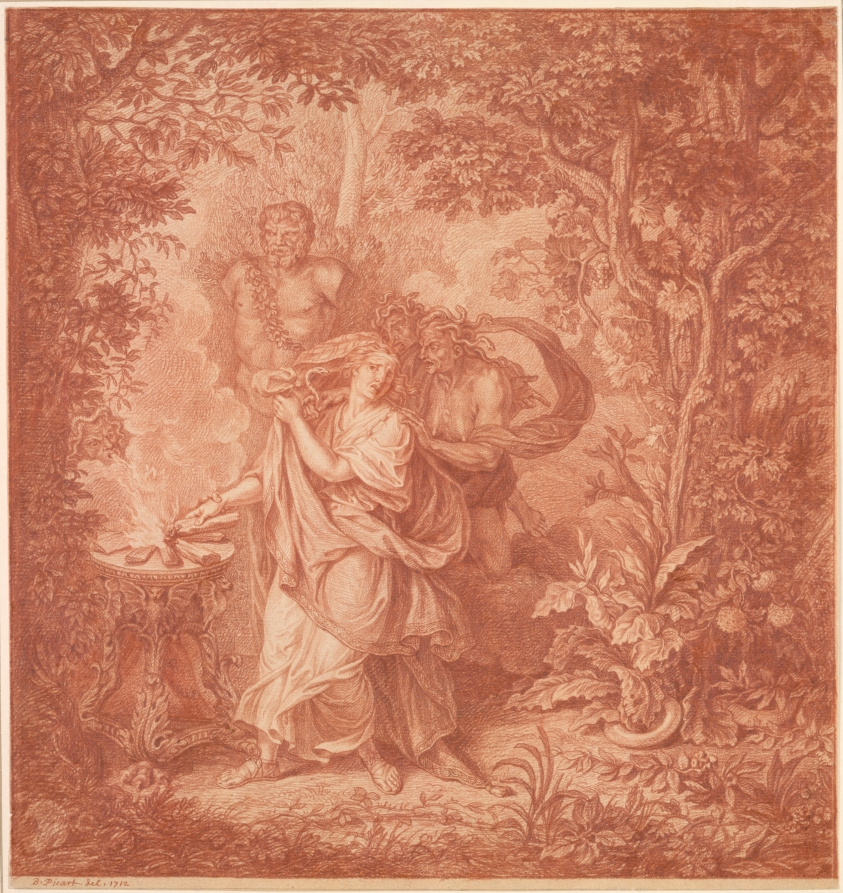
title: Althaea Putting the Fatal Log on the Fire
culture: France, 18th century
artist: Bernard Picart (French, 1673–1733)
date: 1712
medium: Red chalk on beige laid paper, incised for transfer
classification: Drawing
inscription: signed, lower left, in red chalk: B. Picart. del. 1712; verso, lower left, in blue crayon: 136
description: This drawing depicts a scene from the life of Meleager, a figure from Greek mythology who was prophesied to die when a log in the fireplace at the time of his birth completely burned. At that time, Meleager’s mother, Althaea, put out the log and stowed it away for safekeeping. Years later, in the scene depicted here, Althaea exacts revenge on Meleager for killing her brothers in a dispute. Two Furies, goddesses of vengeance, compel the anguished mother to punish her murderous son by burning the fatal log. Picart made this drawing while overseeing the reproduction of Le Brun’s suite of tapestries narrating tales of Meleager into prints. Picart himself made drawings from the tapestries, of which this sheet is an example. The drawings were then used as guides by printmakers Picart hired to re-create the images as engravings.